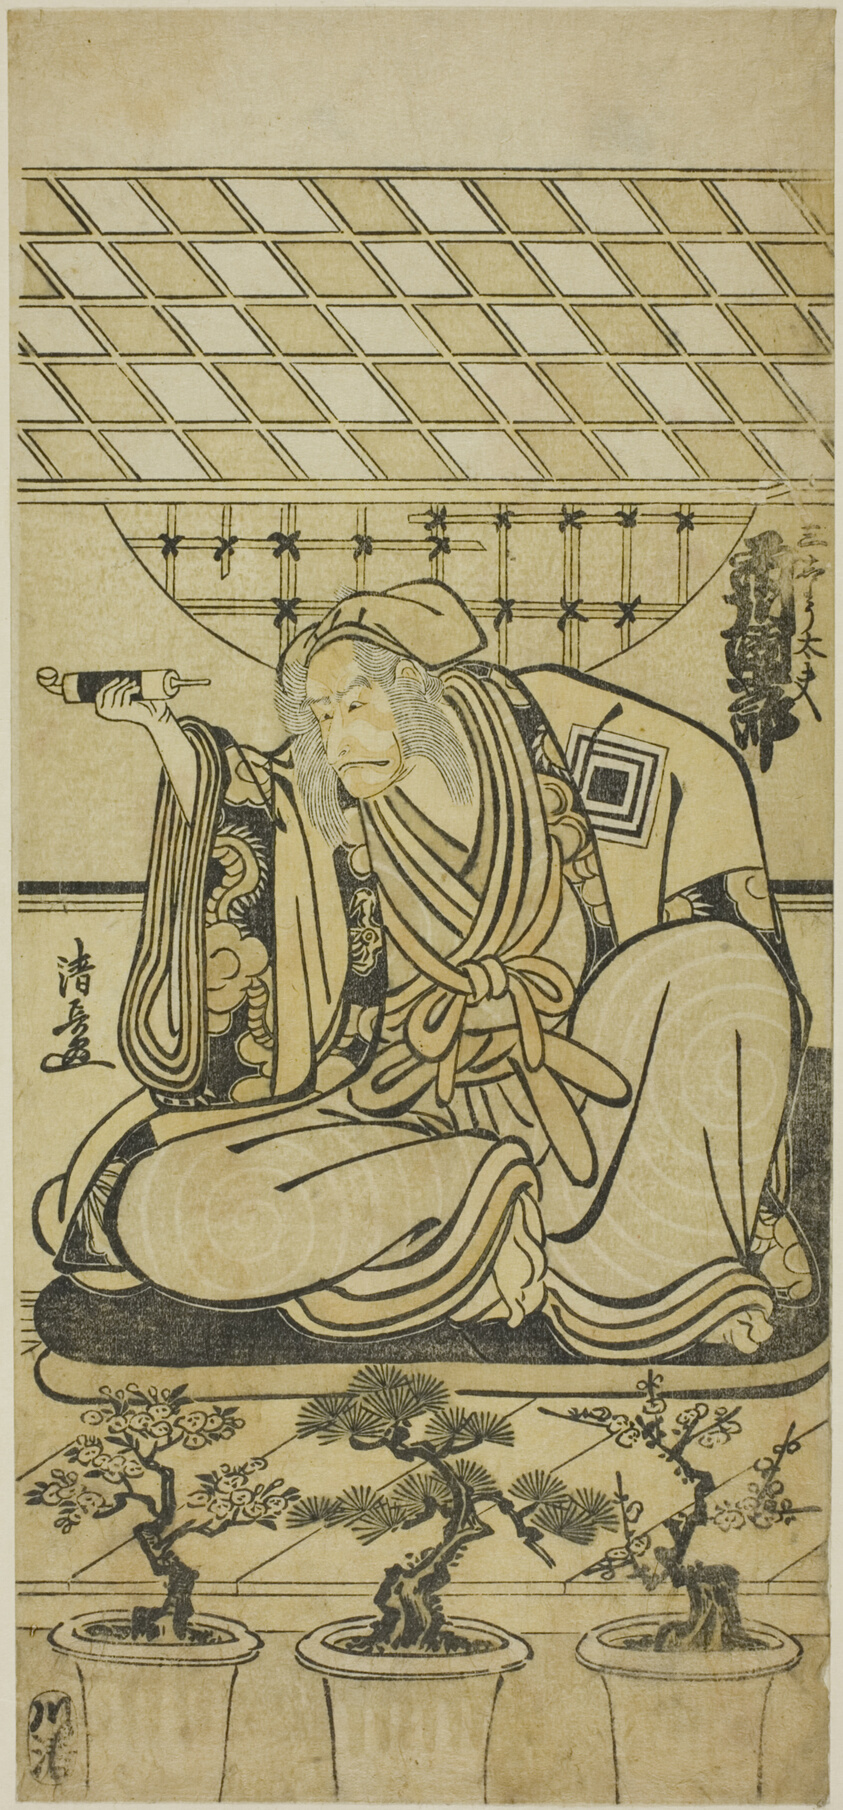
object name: Print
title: The Actor Ichikawa Danjuro V as Sansho Dayu (?)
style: Japanese (culture or style)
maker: Torii Kiyonaga (Japanese, 1752-1815)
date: c. 1780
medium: Color woodblock print; hosoban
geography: Japan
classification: woodblock print; print; asian art